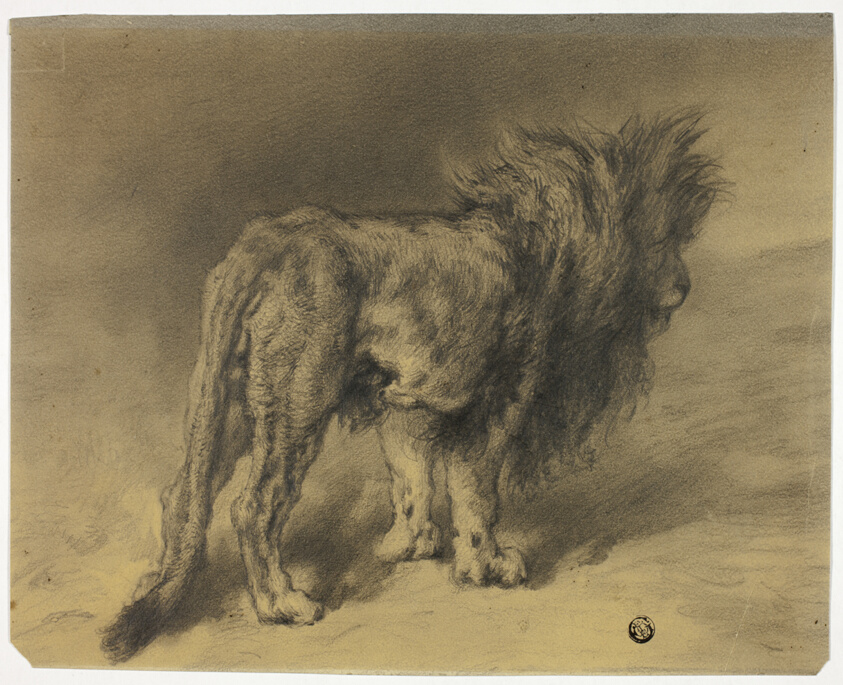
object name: Drawing and Watercolor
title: Standing Lion with Shaggy Mane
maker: Frederik William Zurcher (Dutch, 1835-1894)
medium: Graphite on cream wove paper (discolored to tan)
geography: Holland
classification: graphite; drawings (visual works); prints and drawing